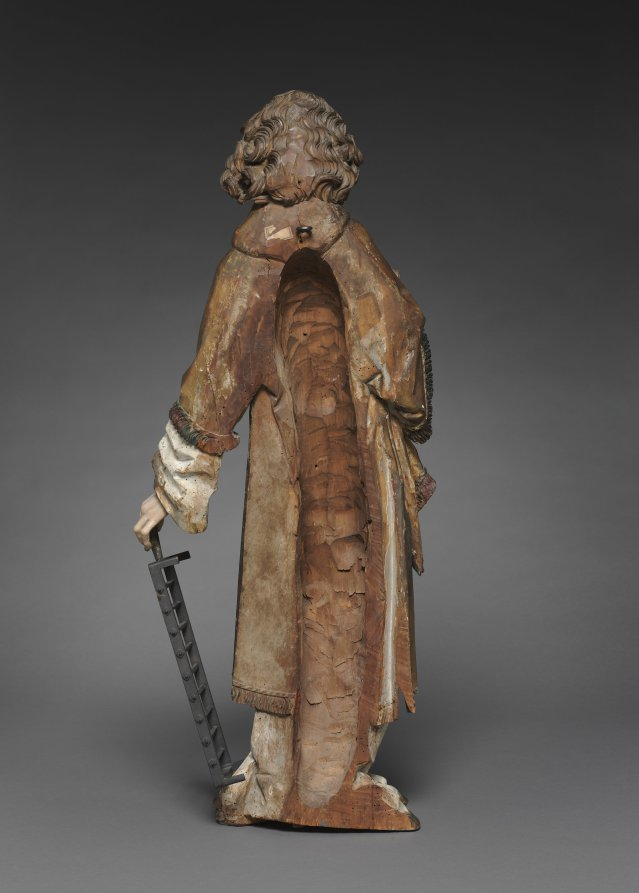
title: Saint Lawrence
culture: Germany, Würzburg, 16th century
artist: Tilman Riemenschneider (German, active Würzburg, c. 1460–1531)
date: 1502–8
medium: lindenwood with polychromy and gilding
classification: Sculpture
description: This sculpture, along with that of Saint Stephen (1959.43), and two female saints preserved in Frankfurt (Historisches Museum), are believed to be the remaining fragments of a large altarpiece carved by Riemenschneider for the Dominican convent in Rothenburg in Franconia (demolished in 1813). Saints Stephen and Lawrence both wear the dalmatic to indicate their status as deacons in the early church. Each holds a symbol of his martyrdom; here, Saint Lawrence holds a grill to indicate his death by burning. Late Gothic Style Art in Germany through the early 1500s remained firmly anchored in the late Gothic style with its associated interests in realism. Riemenschneider was one of the most prolific and versatile sculptors of this style, a recognized master in both stone and wood. His flourishing workshop employed as many as 40 apprentices in sculpting, woodcarving, and painting. His sculptures are noted for the dreamy, melancholy, and introspective quality in their expressions, as well as their remarkable attention to detail.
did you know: Before Riemenschneider finally settled in Würzburg, Germany, in 1484, he traveled to Strasbourg and Colmar, where he became acquainted with the works of the engraver Martin Schongauer.